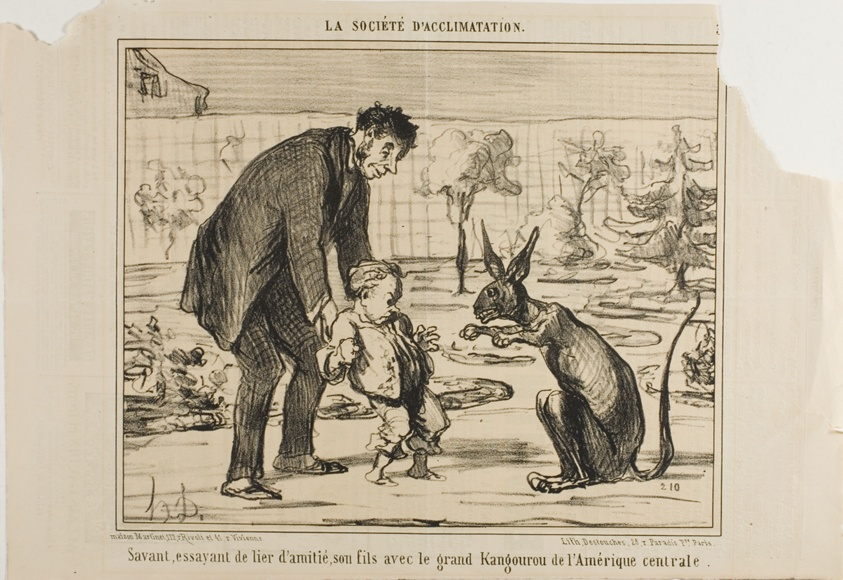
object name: Print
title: A Scientist Trying to Befriend his Son with a Great Kangaroo from Central America, plate 3 from La Société D'acclimatation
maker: Honoré Victorin Daumier; French, 1808-1879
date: 1858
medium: Lithograph in black, with fawn tint stone on ivory wove paper, with letterpress verso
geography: France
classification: lithograph; print; prints and drawing